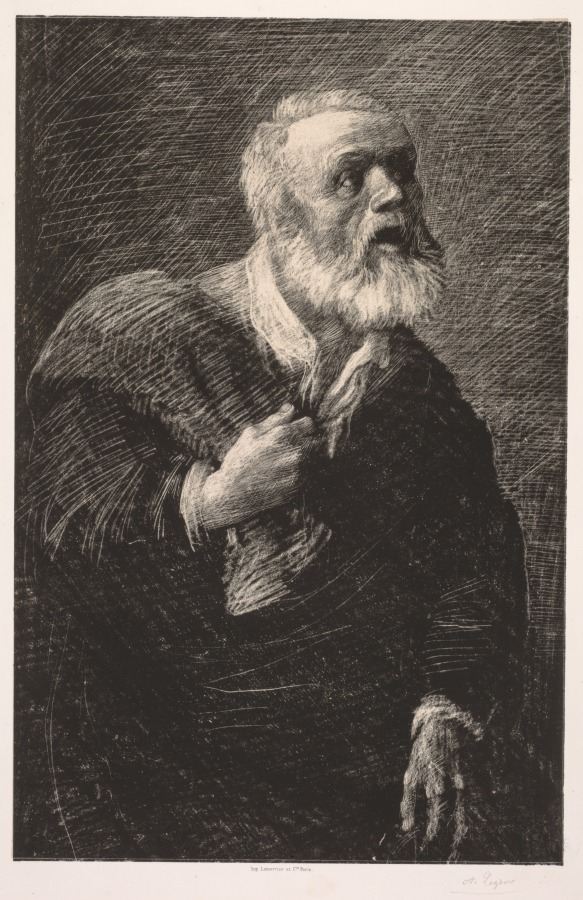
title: The Night Crier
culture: France, 19th century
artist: Alphonse Legros (French, 1837–1911)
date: c. 1857–1911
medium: lithograph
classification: Print